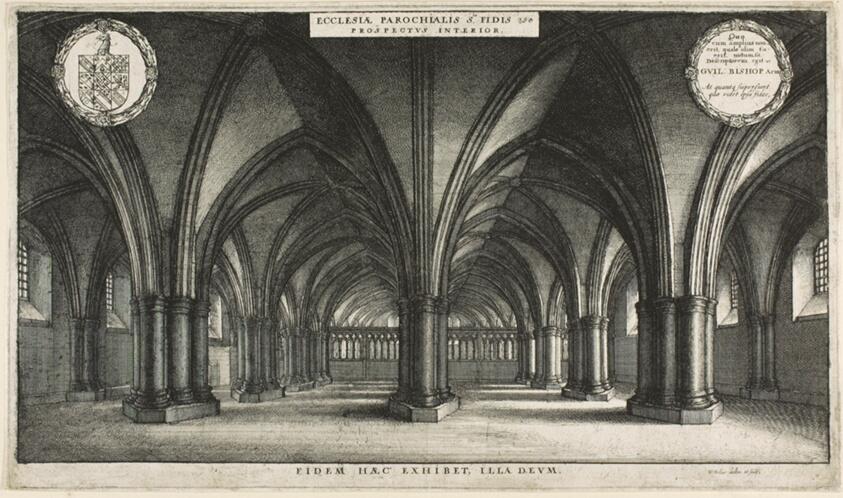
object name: Print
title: Interior of the Crypt of St. Paul's (St. Faith's)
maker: Wenceslaus Hollar (Bohemian, 1607-1677)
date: 1658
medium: Etching on ivory laid paper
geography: Bohemia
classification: etching; print; prints and drawing